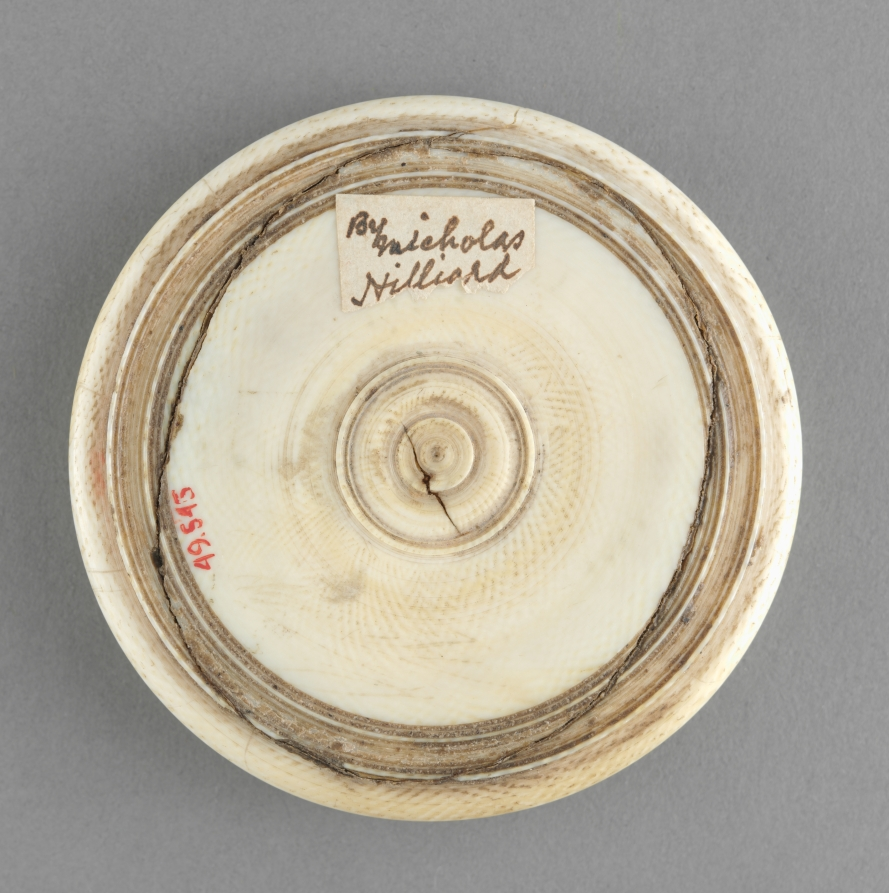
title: Portrait of a Woman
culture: England, 16th century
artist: studio of Nicholas Hilliard (English, c. 1547–1619)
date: 1590s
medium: watercolor on vellum in original turned ivory case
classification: Portrait Miniature